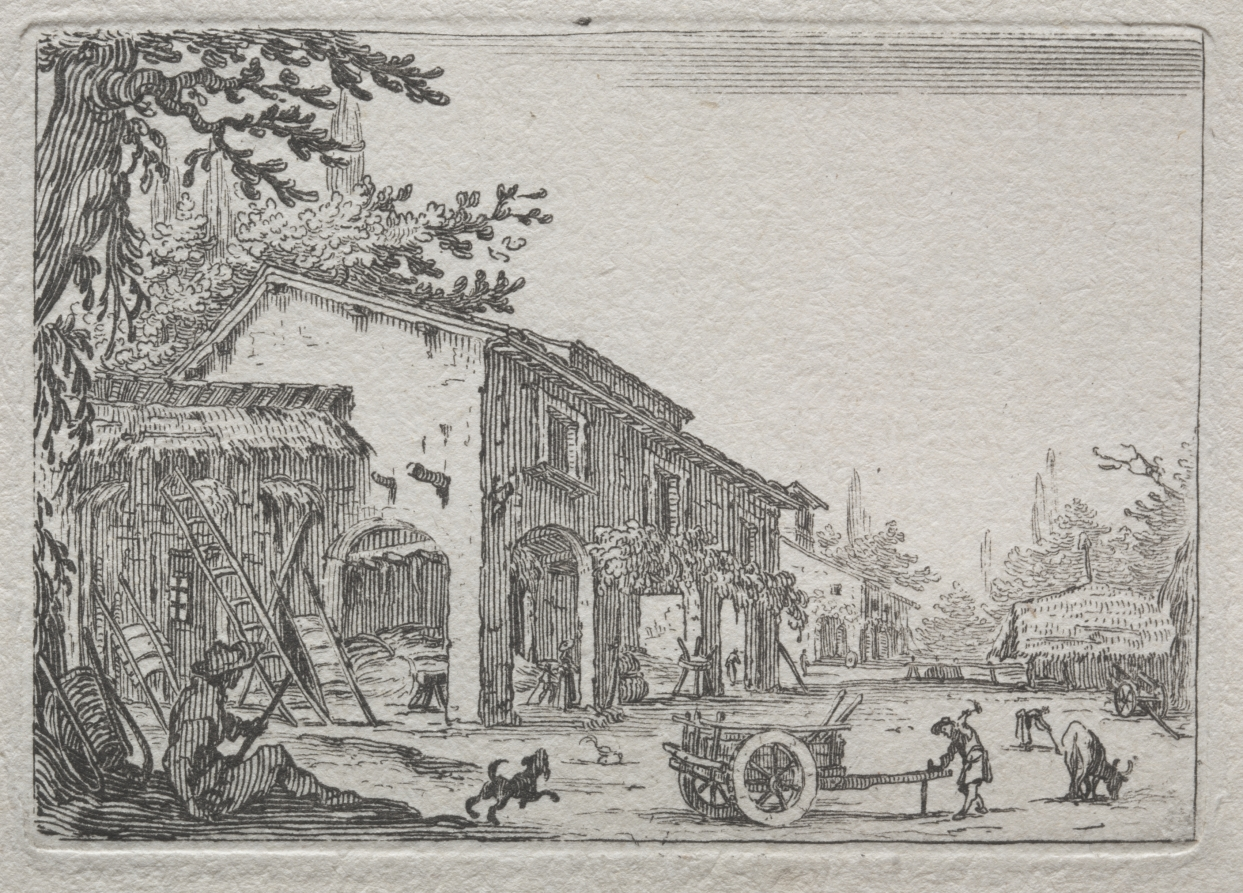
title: Caprices: The Italian Farm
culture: France, 17th century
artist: Jacques Callot (French, 1592–1635)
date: 1635–46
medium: etching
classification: Print